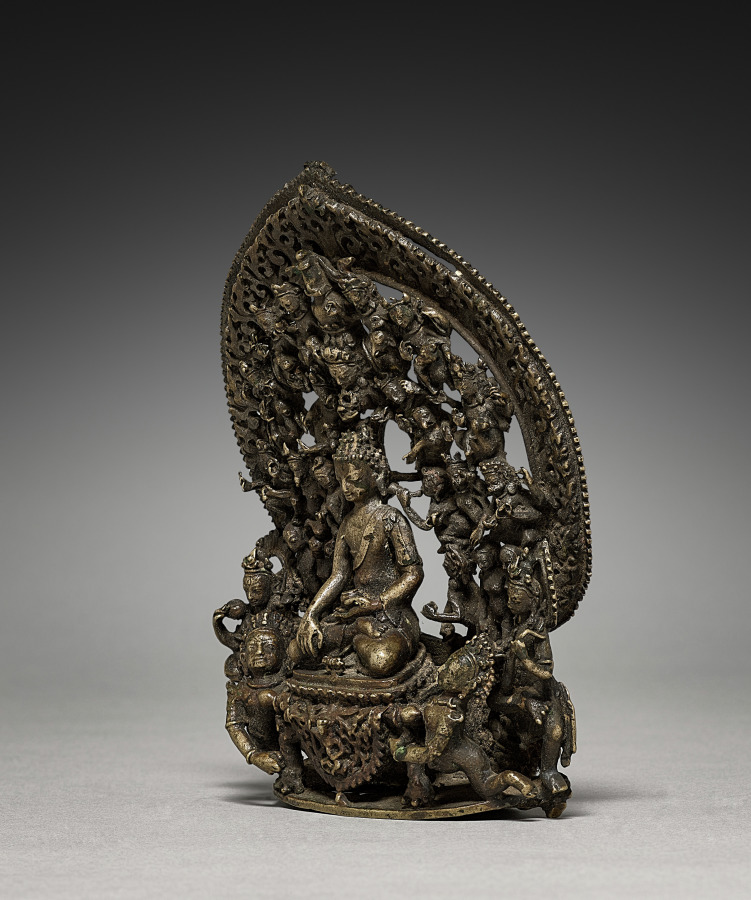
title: Triumph of the Buddha, Marvijaya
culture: Nepal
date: 1400s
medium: bronze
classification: Sculpture